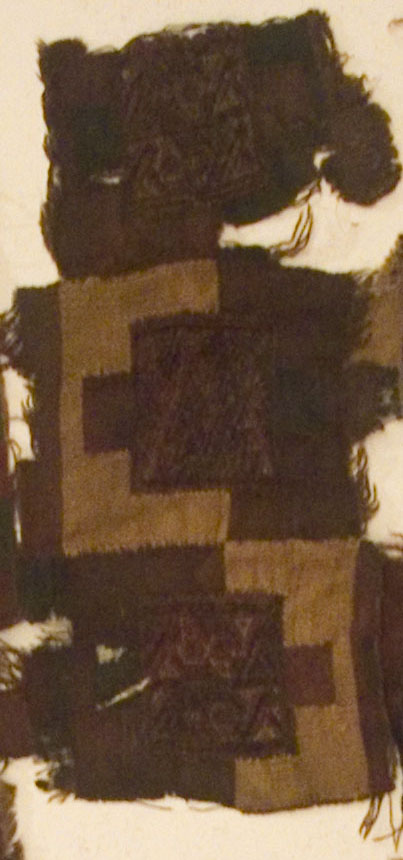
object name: Textile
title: Fragment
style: Chuquibamba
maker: Chuquibamba (Probably south coast, Peru)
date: A.D. 1476/1532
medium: Brocaded interlocking tapestry (old card)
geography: Peru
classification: textile; weaving